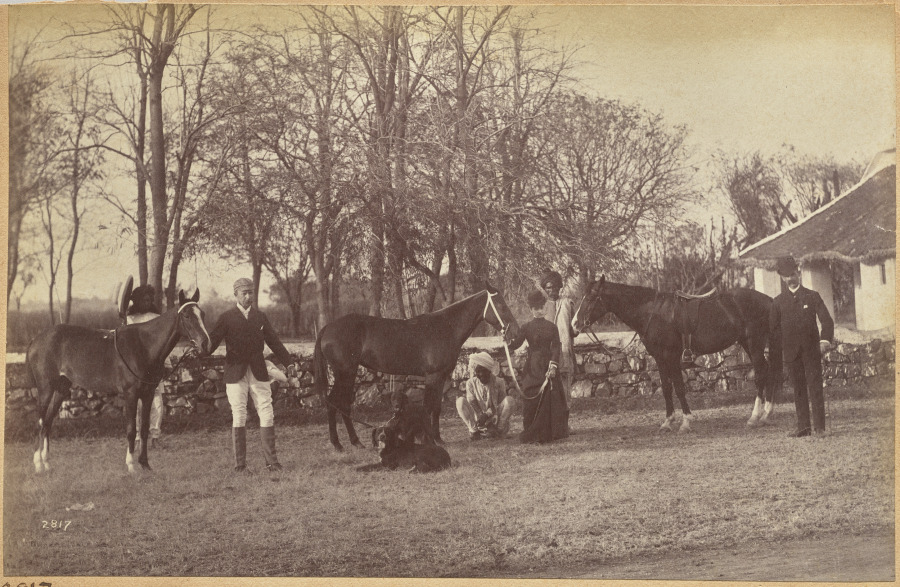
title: Captain Brown's horses, Jhansi (recto, top)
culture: India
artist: Raja Deen Dayal (Indian, 1844–1905)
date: c. 1882–87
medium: albumen print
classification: Photograph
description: These photographs are part of an album, now disassembled, of around 105 photographs taken in India between 1885 and summer 1887 that provide glimpses into the lives of the British colonial elite and royal and upper-class Indians. The museum holds another group of 37 pictures from this album (2016.266), which was probably commissioned by a British civil servant visiting or working in India around 1888 as a personal souvenir of his experiences there.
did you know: Raja Deen Dayal is regarded now, and was considered during his lifetime, to be India’s most important 19th-century photographer.